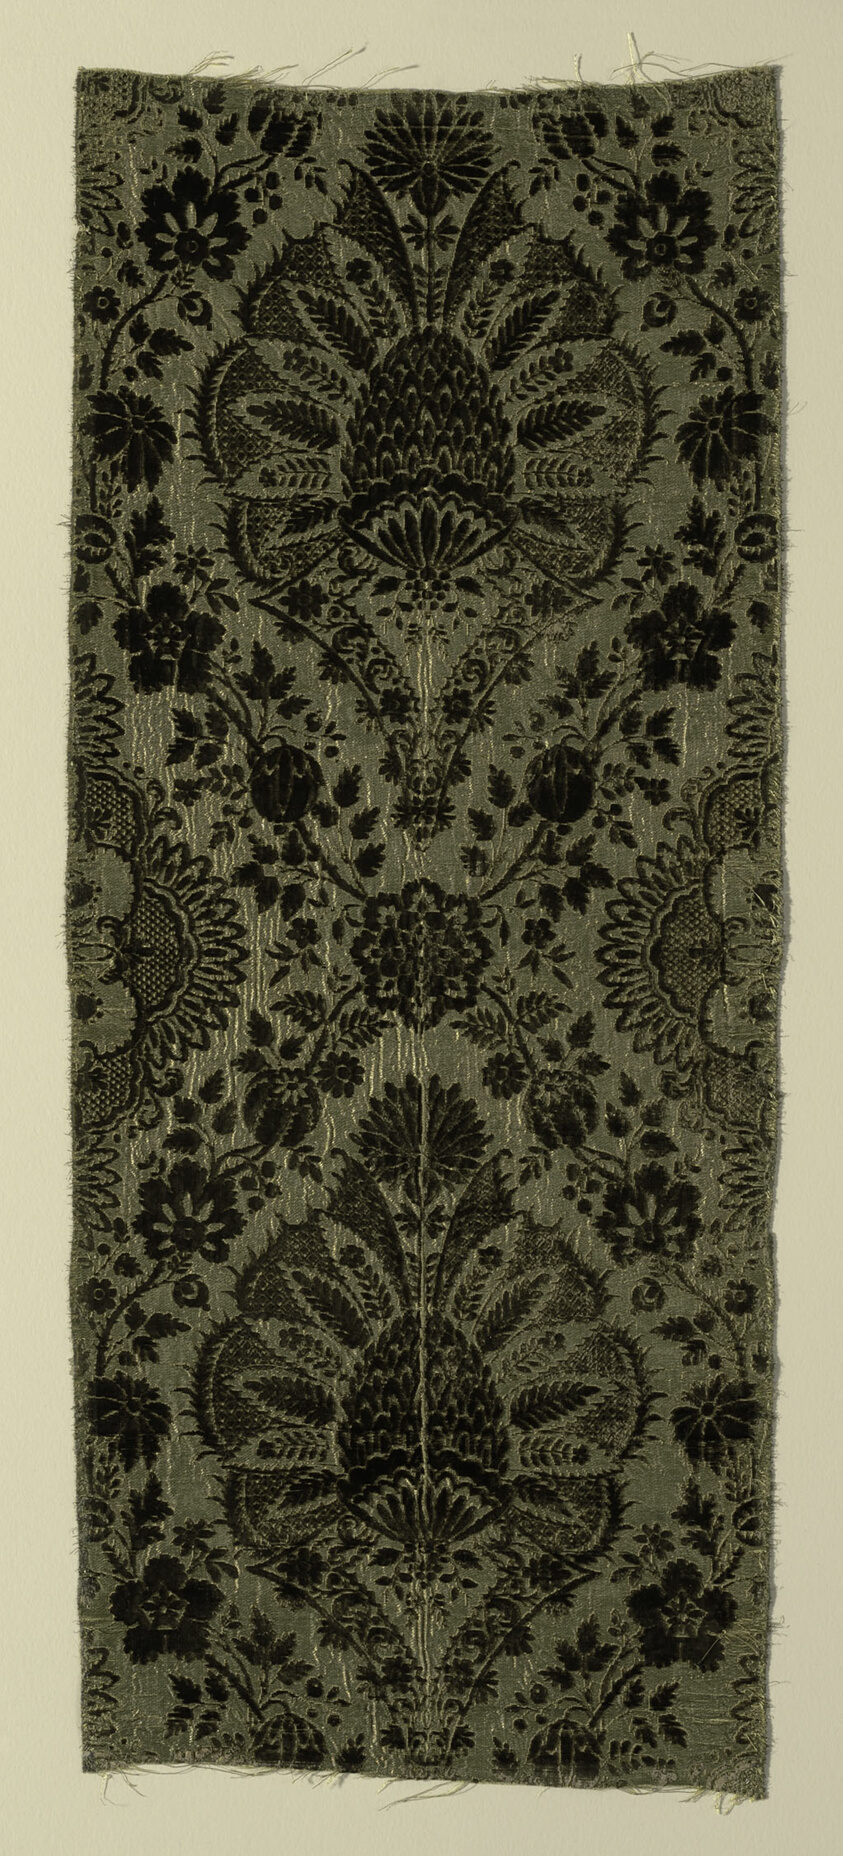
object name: Textile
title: Fragment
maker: France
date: 18th century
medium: Silk, cut, and voided velvet with additional patterning wefts in gold foil (cut strips, wound around silk core); against twill weave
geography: France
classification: textile; weaving - velvet; weaving